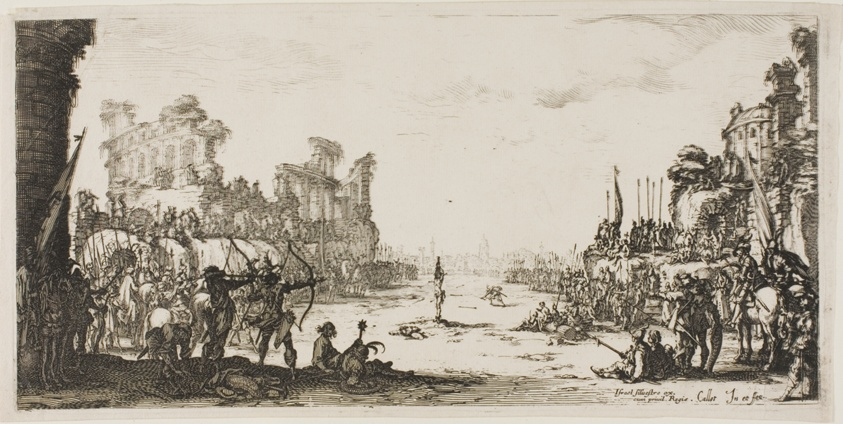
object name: Print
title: The Ordeal by Arrows (Saint Sebastian)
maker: Jacques Callot (French, 1592-1635)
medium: Etching on paper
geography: France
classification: etching; print; prints and drawing